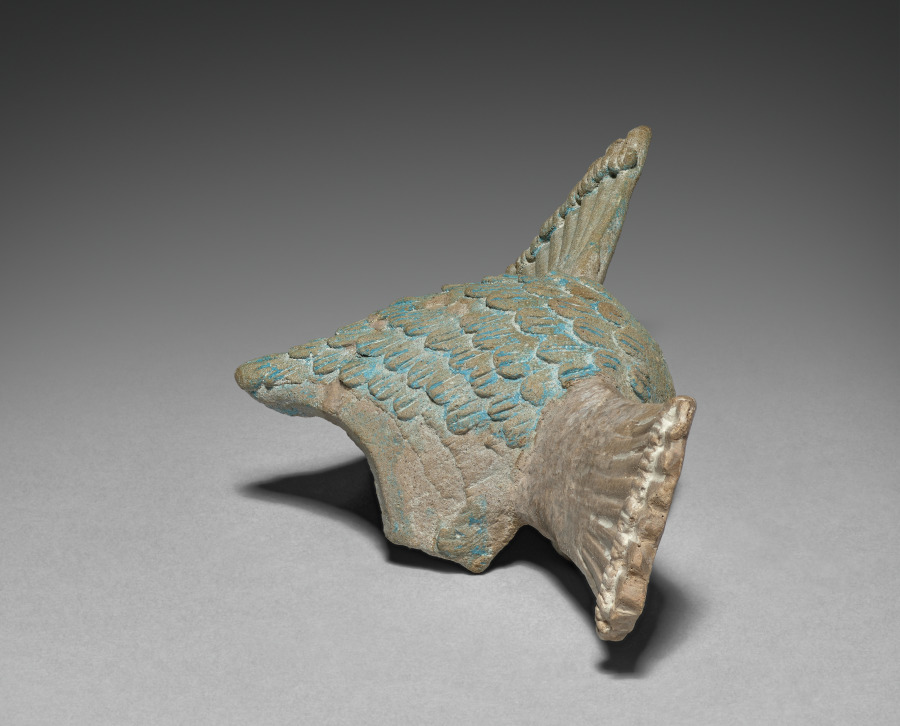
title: Warrior Figurine with Removable Headdress (headdress)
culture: Mexico, Yucatán, Jaina Island region, Campeche, Maya style (250-900)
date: 600–900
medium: earthenware with pigment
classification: Sculpture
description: The major offerings placed in the Maya graves of Jaina Island were ceramic figurines, some of Mesoamerica's finest, that depict deities and humans in a variety of roles. This removable headdress belongs to a warrior figure who once probably held weapons and wears either quilted cotton armor or the feathered uniform of a military order. We don't know why such figures are often pot-bellied.